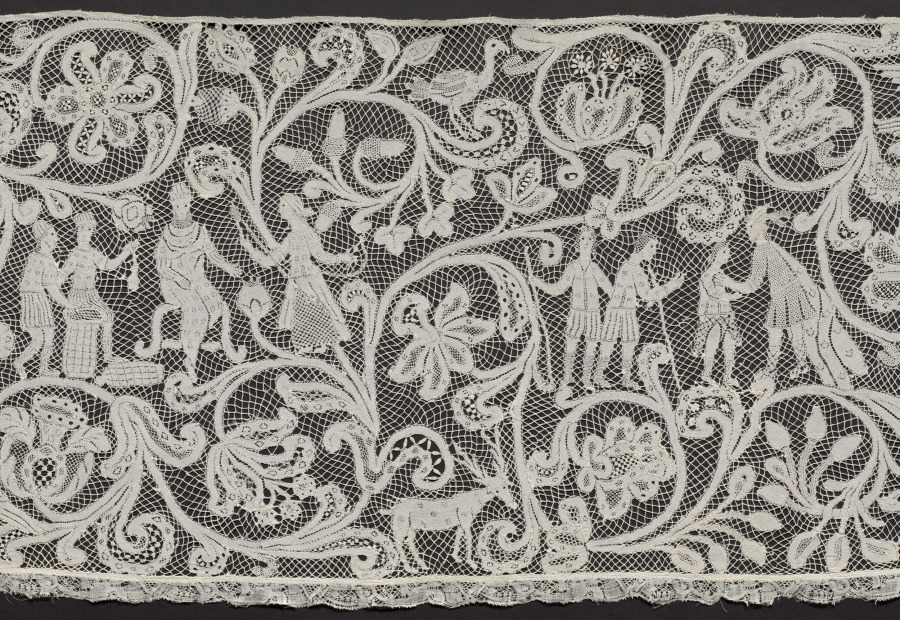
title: Lace Flounce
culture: Italy, Milan(?)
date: 1750–99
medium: Linen: bobbin lace (Punto di Milano)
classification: Lace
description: Being the most prestigious material, lace was used extensively by the 1600s for altar linen and for trimming priest’s albs, often incorporating finely rendered religious images amid blossoming vines. This alb flounce depicts scenes from the Old Testament story of Joseph, whose jealous brothers sold him to a caravan bound for Egypt. Joseph later interpreted dreams of the pharaoh, who made him ruler. When famine in Canaan caused Joseph’s ten brothers to travel to Egypt in search of food, they bowed down to him. After he revealed his identity, he forgave his brothers and God saved the family.